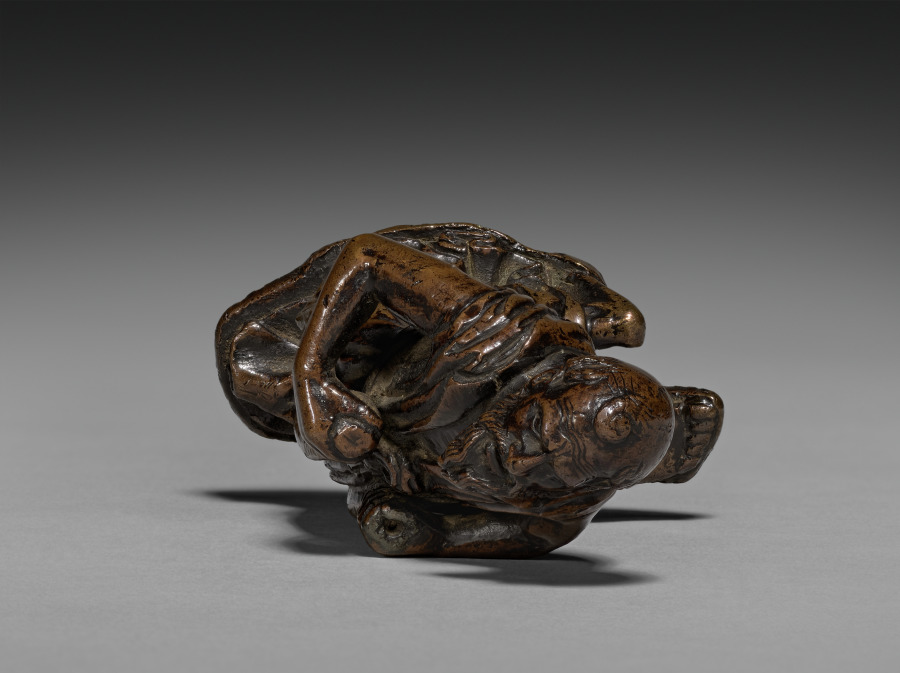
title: Kneeling Saint Jerome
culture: Italy, Ravenna, 16th century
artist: workshop of Severo da Ravenna (Italian, c.1496–c.1543)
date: c, 1525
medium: bronze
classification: Sculpture